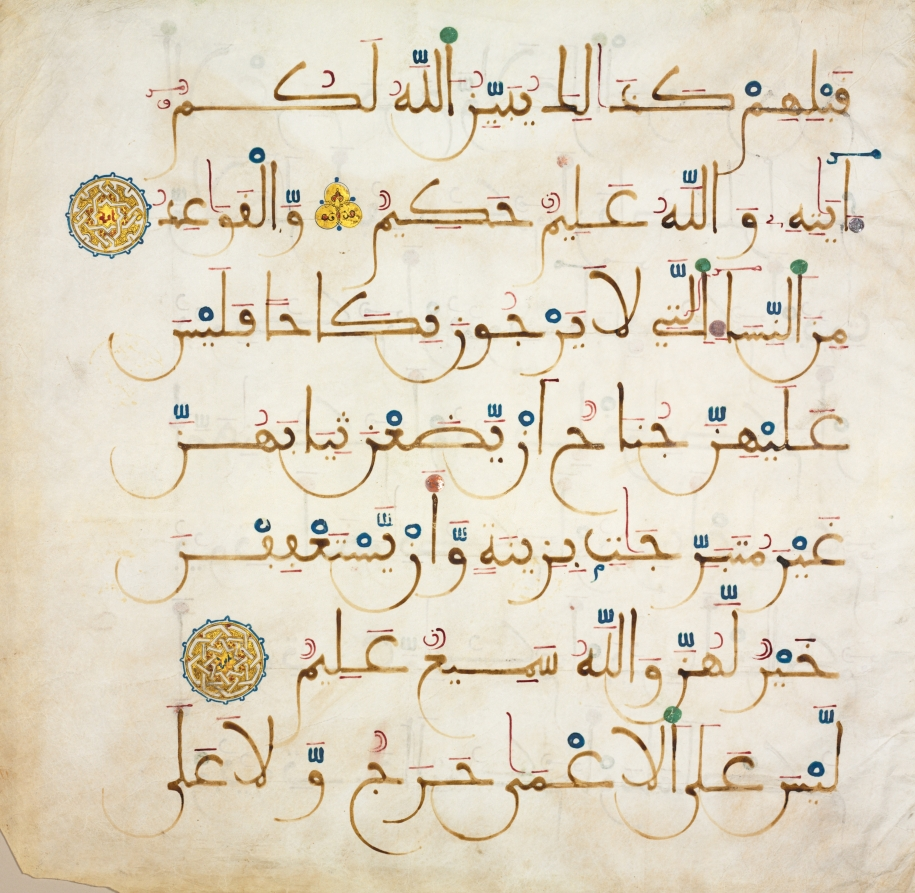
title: Qur'an Manuscript Folio (recto)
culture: Southern Spain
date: 1200s–1300s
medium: ink, gold, and color on parchment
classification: Manuscript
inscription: Sura al-Nur [Chapter: The Light] 24:part 59-part 61 (Arabic) Maghribi (seven lines to a page)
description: This page from the “Chapter of Light” (24:59–61) in the Qur'an is written in the monumental script of Islamic Spain and North Africa, known as Maghribi Kufic. Words flow rhythmically with curving flourishes toward the left margin where letters end in almost perfect semicircles, an elegant hallmark that contrasts with the upright shafts. Distinctive markings—vowels in red and diacritics in blue—identify the vocalization of the text, which would have been read or recited aloud to an assembly.